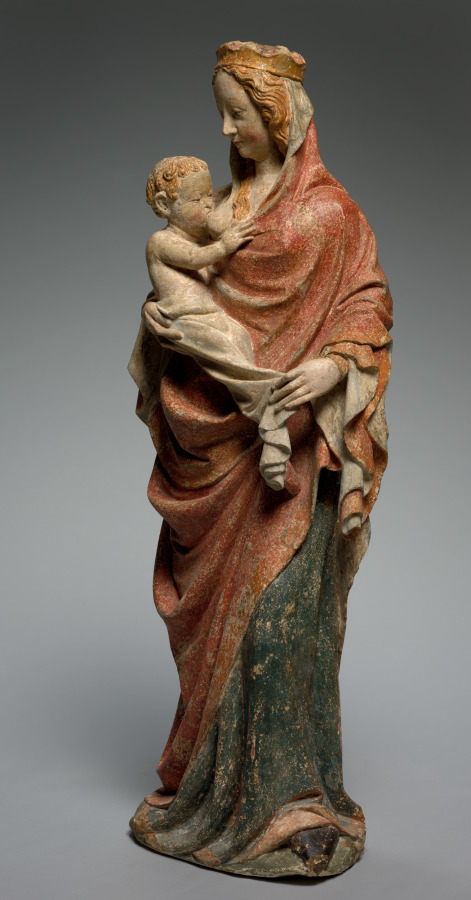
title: Virgin Nursing the Christ Child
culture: France, Île de France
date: c. 1370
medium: painted limestone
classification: Sculpture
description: This sculpture of the Virgin Mary nursing the Christ child subtly emphasizes the intimate relationship between mother and child and brings the Son of God in his human existence closer to the viewer. The emotional interaction is characteristic of sculpture since the mid-1300s, especially in the circles close to the court of the French kings in Paris and Emperor Charles IV (reigned 1346–78) in Prague. These novel stylistic tendencies were possibly a reaction to the fear and uncertainty incurred by the first great plague wave in 1348.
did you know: The back of this sculpture is unfinished since it would have originally been placed against a wall or pier.